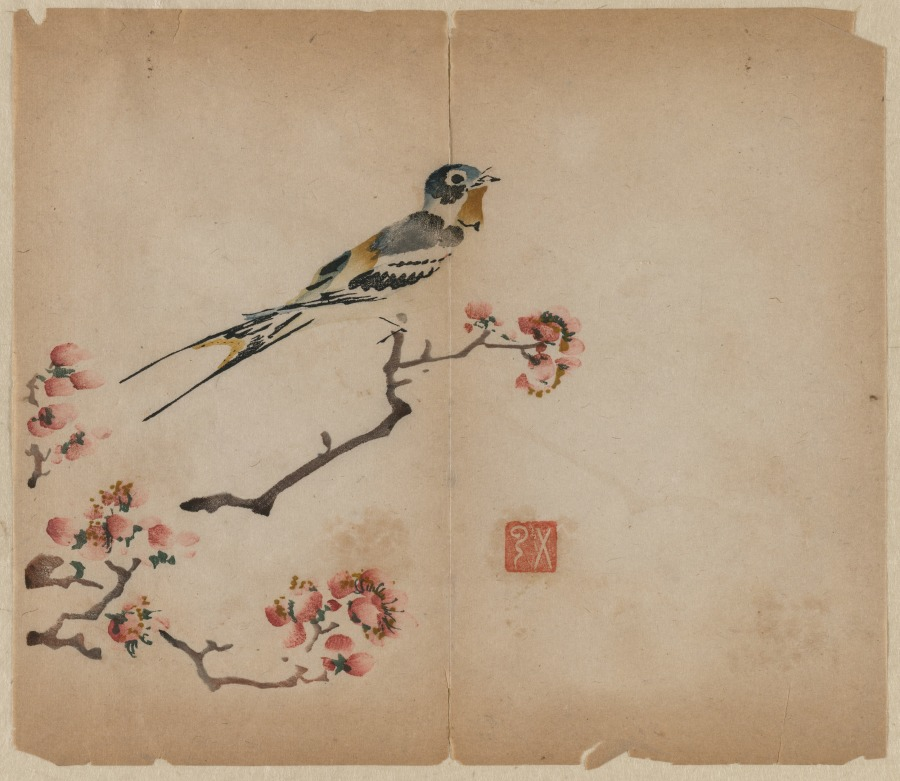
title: Swallow on Flowering Peach Branch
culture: China, Ming dynasty (1368-1644) or later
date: 1368–1644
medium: color woodblock print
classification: Print